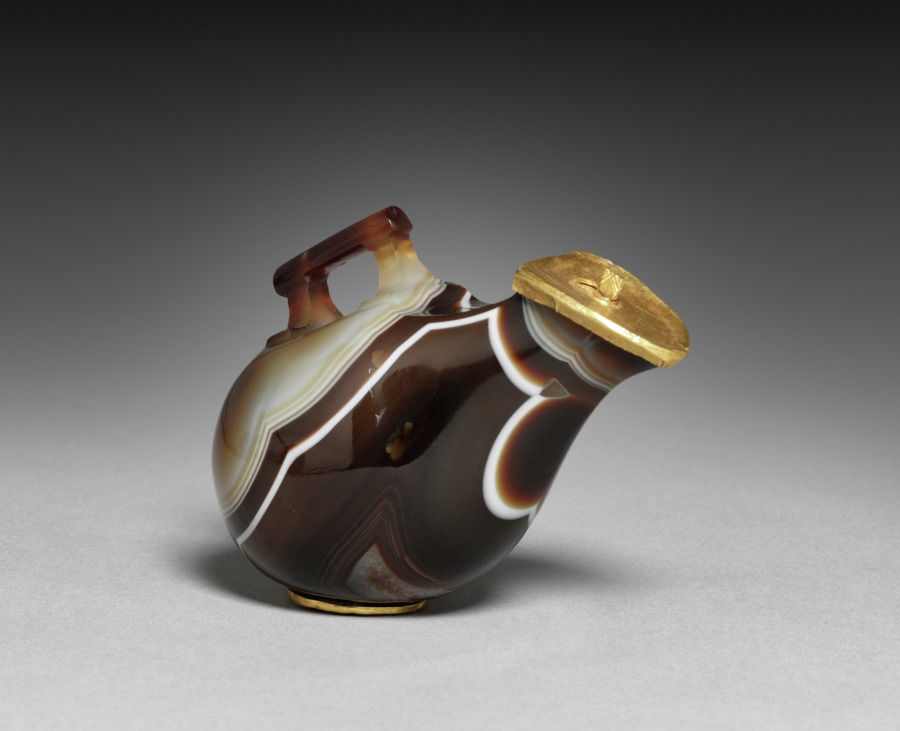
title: Askos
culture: Greece, Ptolemaic Dynasty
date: 200–1 BCE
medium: agate and gold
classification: Cosmetic Objects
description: This miniature vessel was carved from a single piece of banded agate, polished to a shine, and embellished with a gold lid and gold details on the base. Inside the ring of gold at the base is a trio of gold papyrus stalks, a likely reference to Egypt. In shape, it resembles an ancient wineskin, or askos, though its small size suggests use for luxury perfumes or oils. A tiny crab, likely once inlaid with a precious material, has been carved behind the handle.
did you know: The knob on the lid connects to a hidden disk to control the flow of liquid.